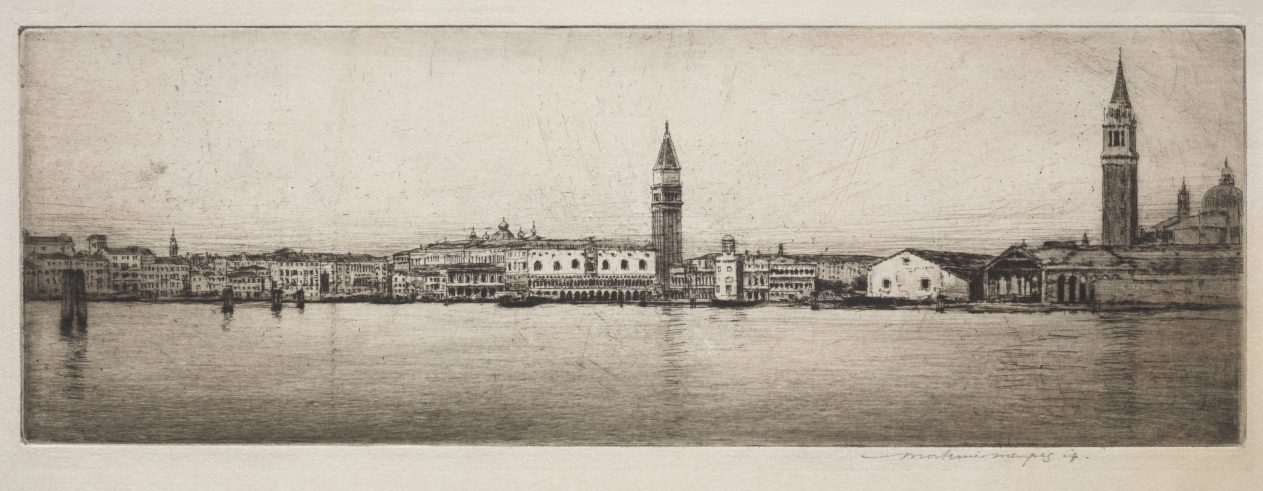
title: St. Mark's Basin, Venice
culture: England, 19th century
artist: Mortimer Menpes (British, 1860–1938)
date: 1910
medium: etching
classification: Print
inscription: signed, below platemark, in graphite; numbered, left corner: "156"